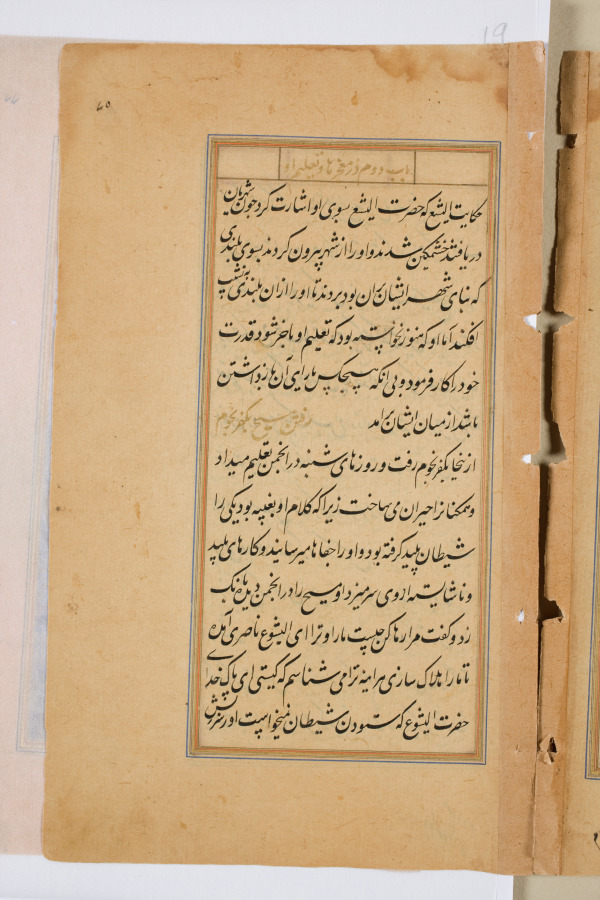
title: Text page from a Mirror of Holiness (Mir’at al-quds) of Father Jerome Xavier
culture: Mughal India, Allahabad, made for Prince Salim (1569–1627)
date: 1602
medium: Ink and gold on paper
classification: Manuscript